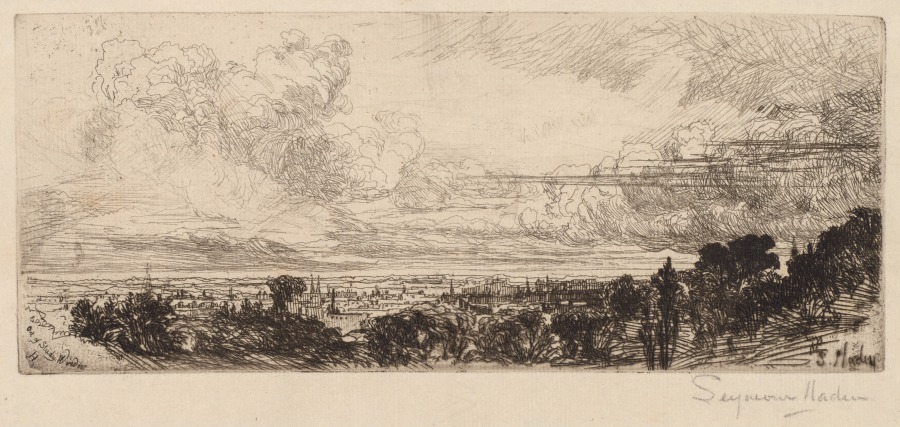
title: Out of Studio Window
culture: Britain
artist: Francis Seymour Haden (British, 1818–1910)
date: 1859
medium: etching with drypoint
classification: Print